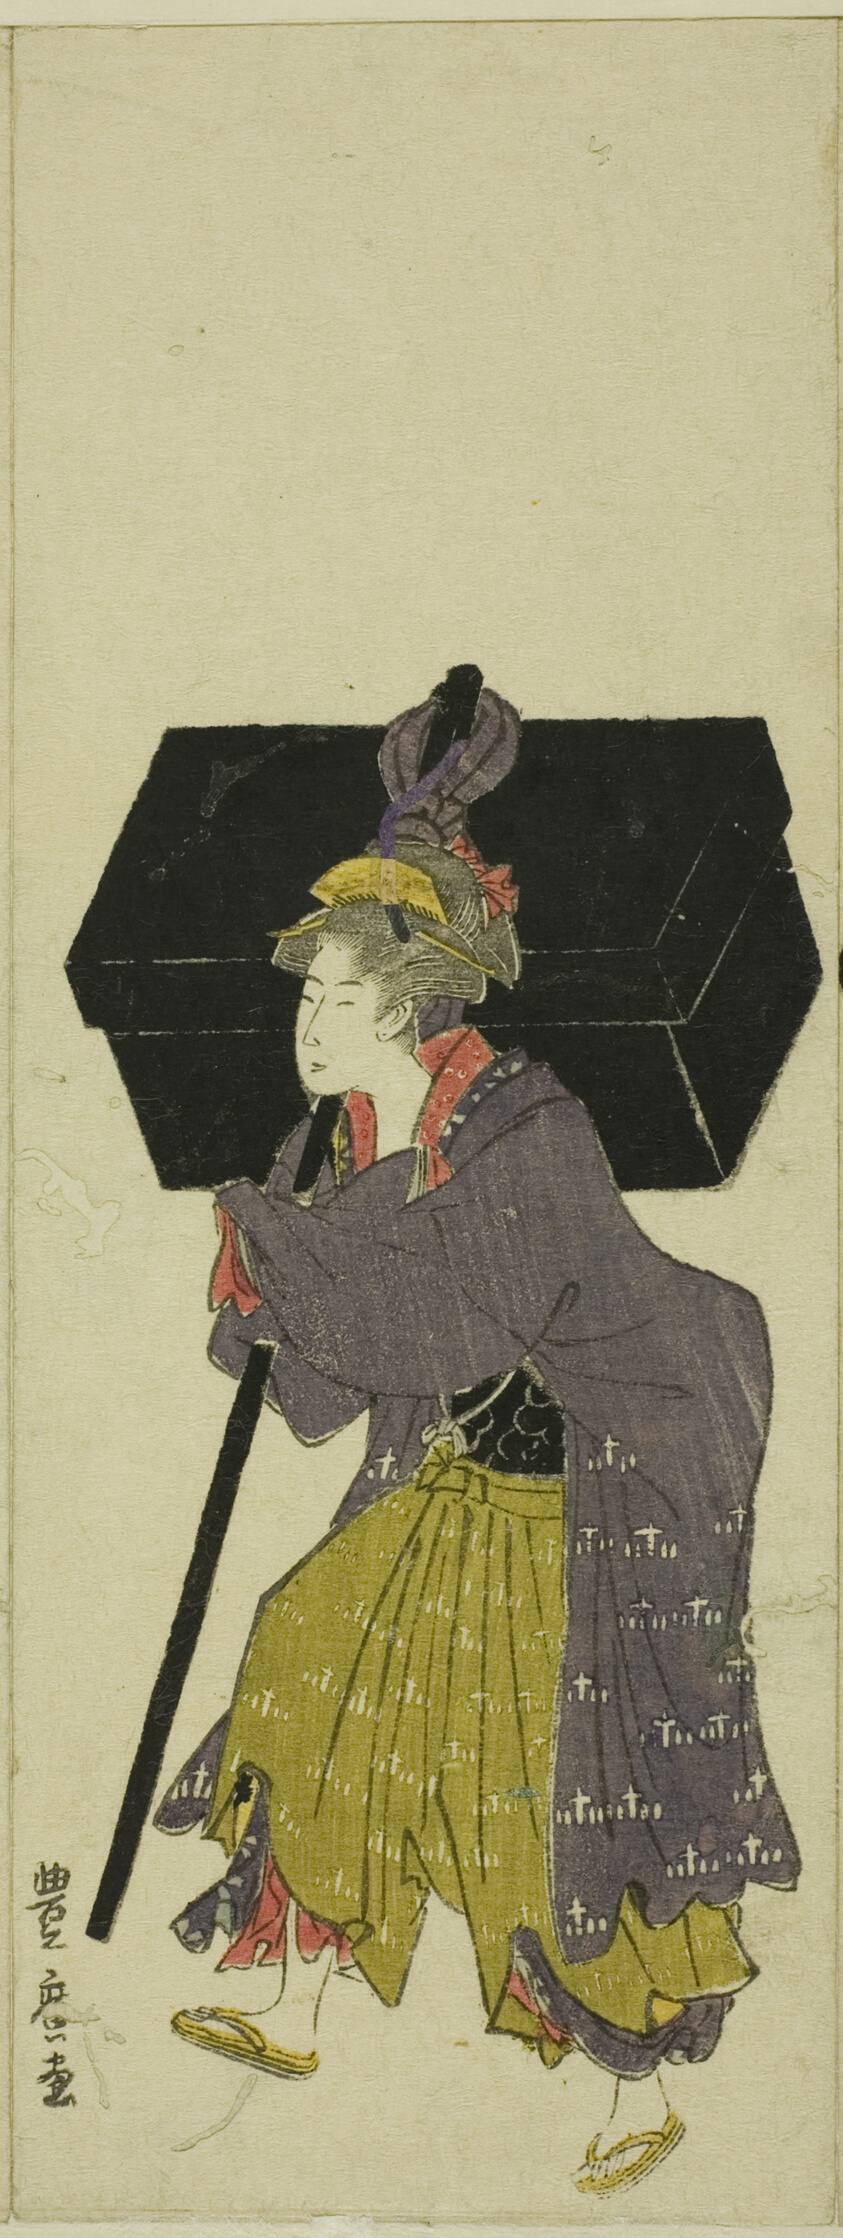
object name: Print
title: Parody of a daimyo procession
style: Japanese (culture or style)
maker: Utagawa Toyohiro (Japanese, 1773-1828)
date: c. 1805/07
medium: Color woodblock print; 1 of 12 sheets (see 1928.391-402)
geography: Japan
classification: woodblock print; print